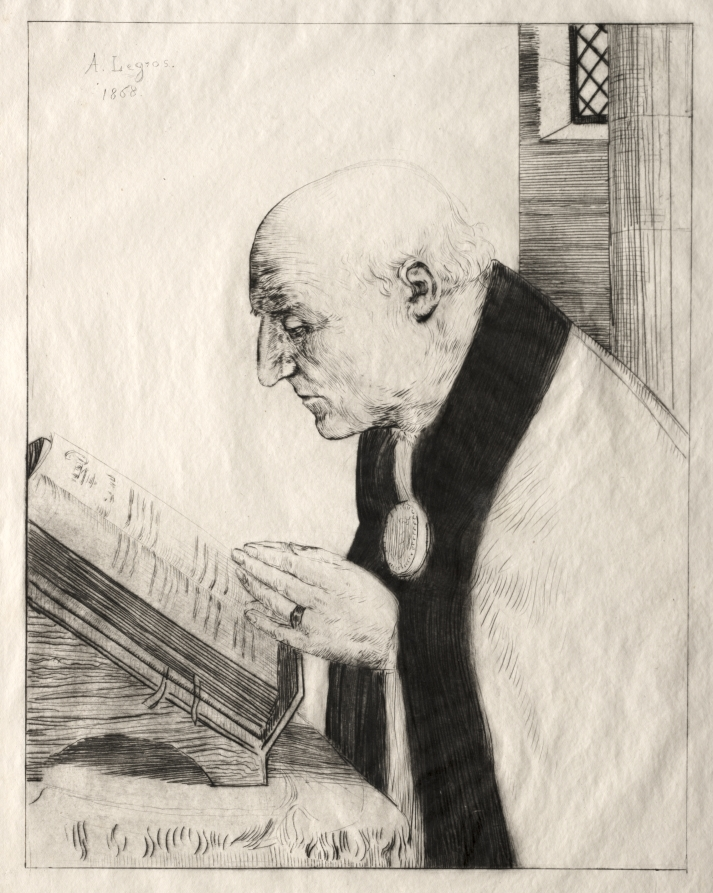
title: Reading the Office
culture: France, 19th century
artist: Alphonse Legros (French, 1837–1911)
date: 1868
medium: drypoint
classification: Print